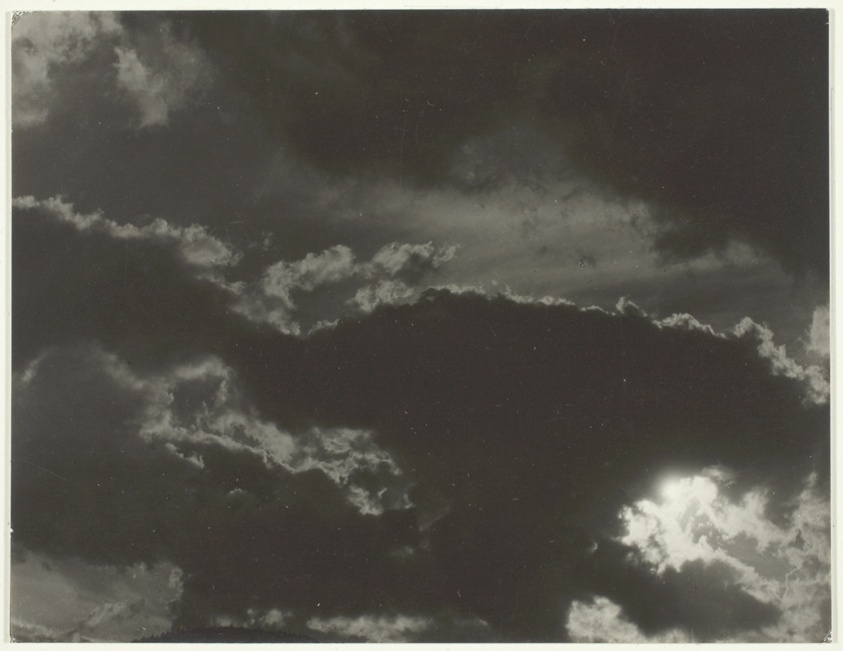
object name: Photograph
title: Equivalent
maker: Alfred Stieglitz (American, 1864–1946)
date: 1927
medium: Gelatin silver print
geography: United States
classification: gelatin silver (developing-out-paper) pr; photographic process; photography; photograph